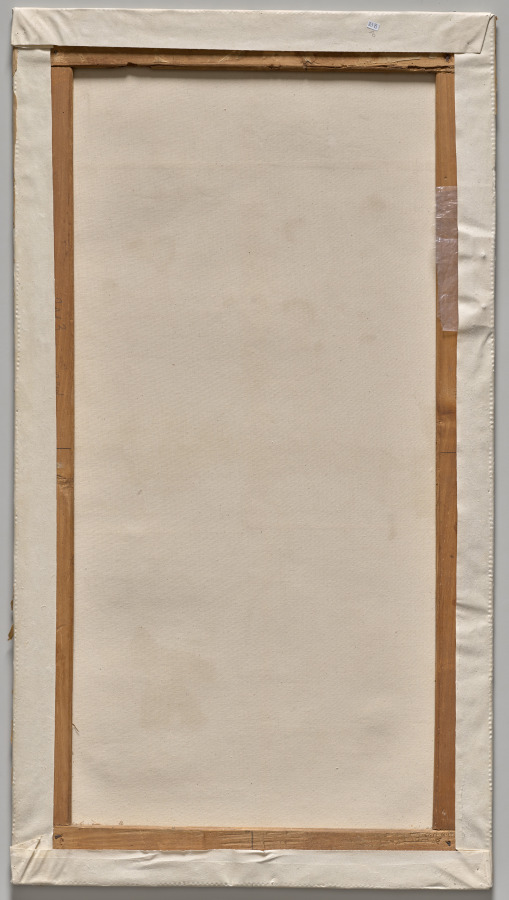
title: Gusu Beauties of the Four Seasons – Spring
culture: China, Qing dynasty (1644–1911), Qianlong period (1736–95)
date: 1736–95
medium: Polychrome woodblock print; ink and color on paper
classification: Print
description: In the 1600s, printing flourished in such Jiangnan cities as Nanjing, Suzhou, Hangzhou, and Huizhou, evolving from privately enjoyed illustrated books printed in color to more commercialized single-sheet color prints that were hung on walls and became part of the rich urban visual culture.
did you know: Woodblock printing in color reached a height in China in the 1600s to 1700s. The prints were executed by means of sets of separate blocks, each carved to print a different color.